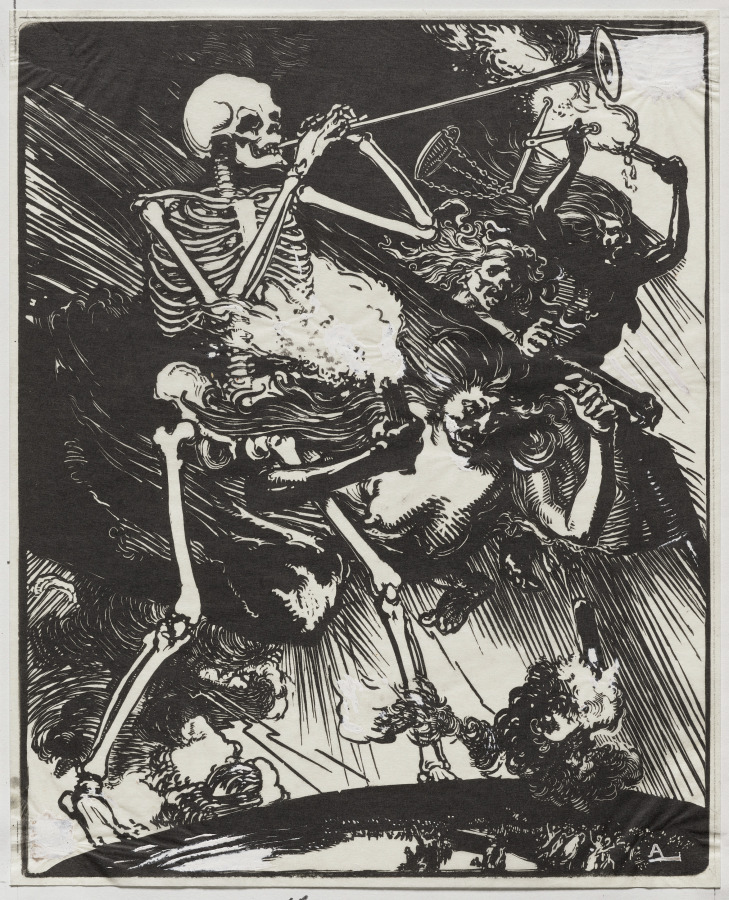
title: La Mort et les Passions fondant sur la terre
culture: France, 20th century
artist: Auguste Louis Lepère (French, 1849–1918)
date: 1914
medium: black crayon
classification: Drawing